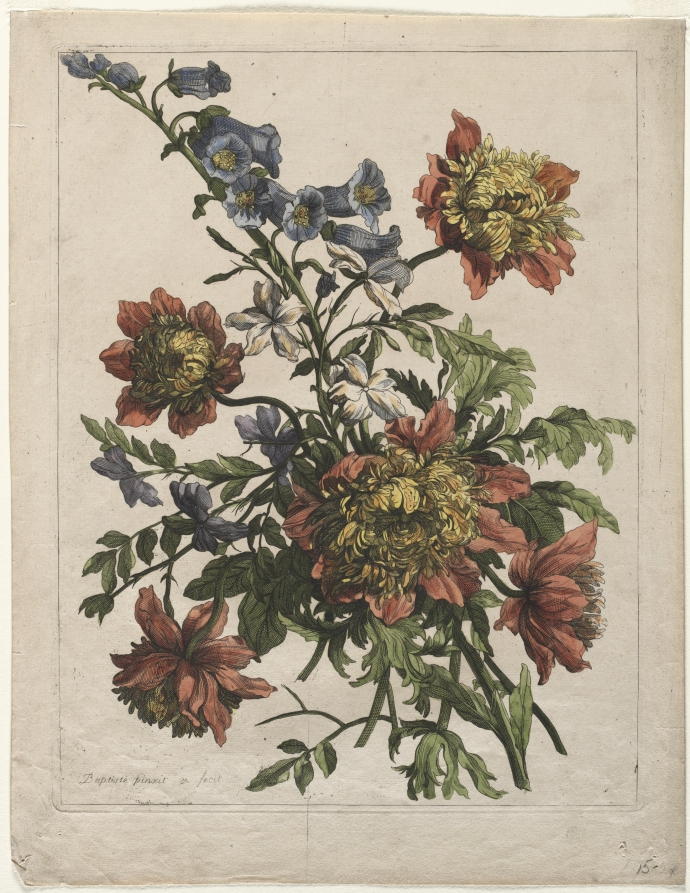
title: Bouquet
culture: France, 17th century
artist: Jean-Baptiste I Monnoyer (French, c. 1636–1699)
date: c. 1680–95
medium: etching and engraving, hand colored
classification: Print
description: Seventeenth-century botanical illustrators were stimulated by a surge of interest in their subject. While in the mid-16th century only 500 plants were known, less than a century later that number had grown to 6,000. A passion for cultivating beautiful rather than useful plants took hold, and formal gardens with carefully arranged flower beds based on embroidery designs supplemented varieties of local plants with foreign samples. Exotic flowers became available in Europe as the Dutch founded colonies in the East and West Indies, South America, and India. While fabulous royal gardens were planted in France at Fontainebleau and the Louvre, for instance, in England “a whole nation went mad about flowers.”